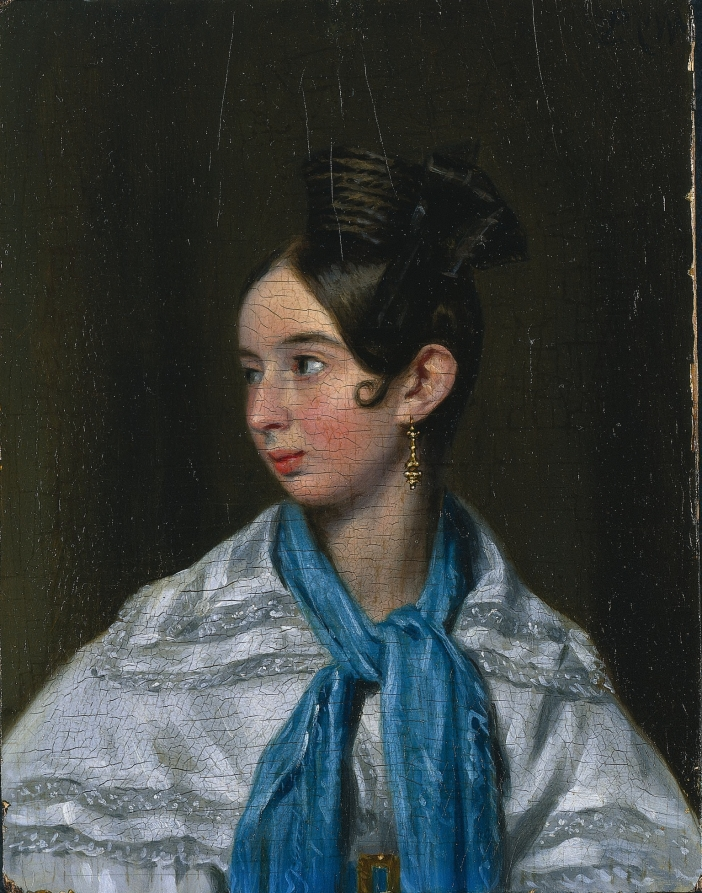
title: Elisa Pearson Playter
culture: Netherlands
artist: Pieter Christoffel Wonder (Dutch, 1780–1852)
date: c. 1837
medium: oil on wood panel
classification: Painting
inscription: Signed in black paint in upper right corner: P.C.W.